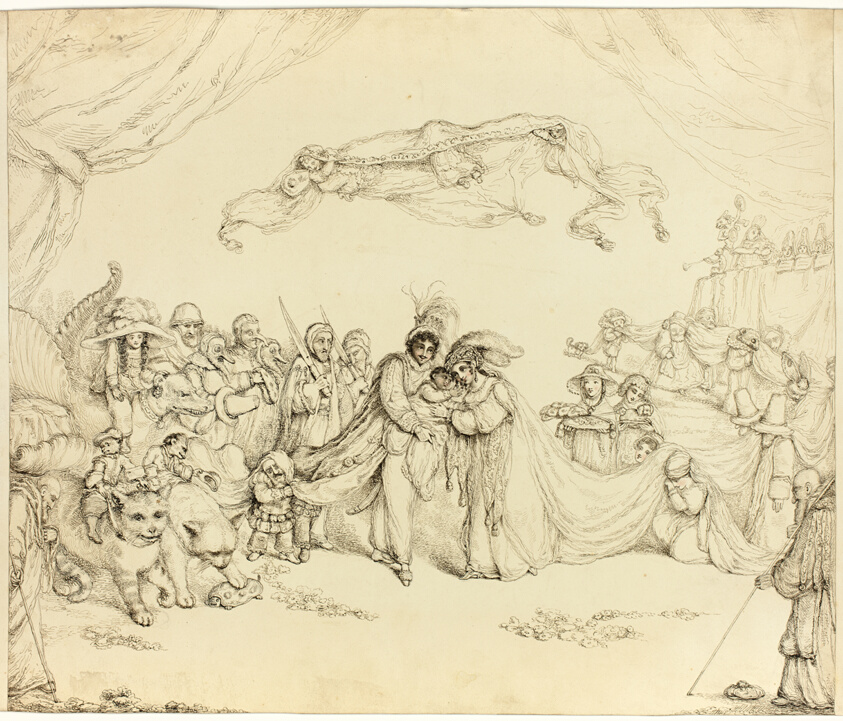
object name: Drawing and Watercolor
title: Oberon and Titania, from A Midsummer Night's Dream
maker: Charles Kirkpatrick Sharpe (English, 1781-1851)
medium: Pen and brown ink, with touches of red watercolor, over graphite, on cream wove paper, laid down on board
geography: England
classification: pen and ink drawings; drawings (visual works); prints and drawing; paper